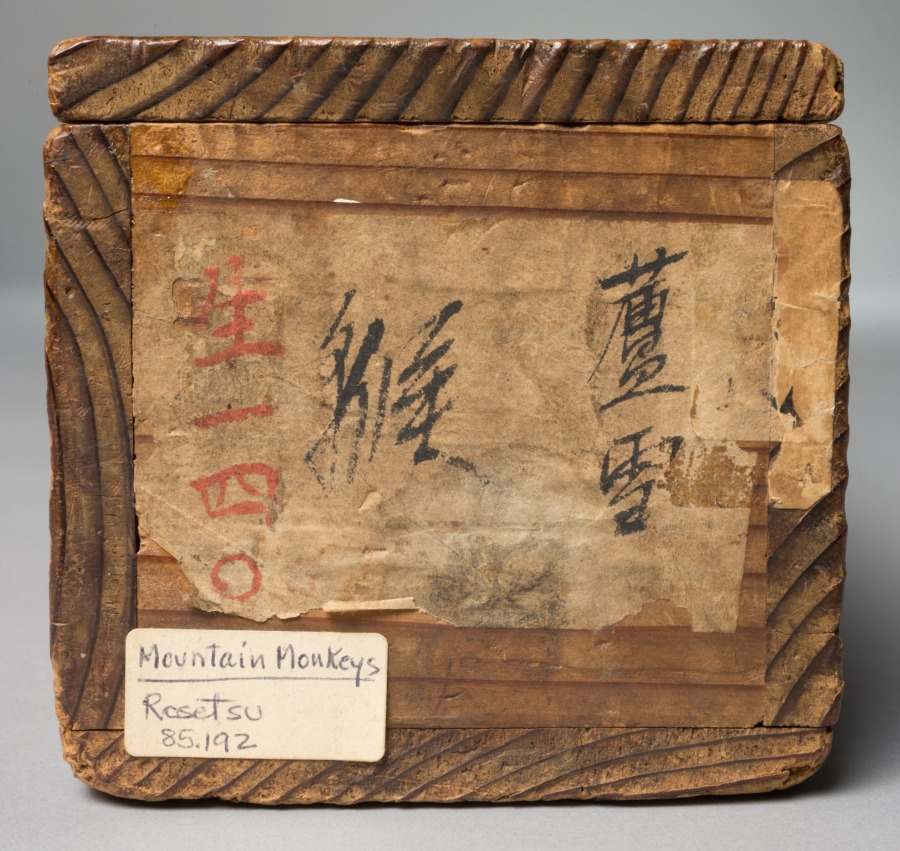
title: Monkeys by a Stream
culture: Japan, Edo period (1615–1868)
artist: Nagasawa Rosetsu (Japanese, 1754–1799)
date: c. 1796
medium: hanging scroll; ink and color on paper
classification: Painting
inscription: Inscription: 平安蘆雪寫意; Transliteration: Heian Rosetsu shai; Sealed: 魚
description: The two monkeys in this painting are Japanese macaques. The one in front dangles its left leg over a sharply angled rock, surveying the land beyond a fast-moving mountain stream. A smaller monkey sits behind it, looking directly ahead as if it realizes it is being watched. The artist used just a few highly contrasting warm and cool colors, sweeping brushstrokes over ink washes, and loose lines to create a scene that powerfully evokes the mentally engaged state of the two animals.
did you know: Monkeys, which are found throughout the mountainous and wooded areas of Japan, became a favorite subject of many later Japanese artists.